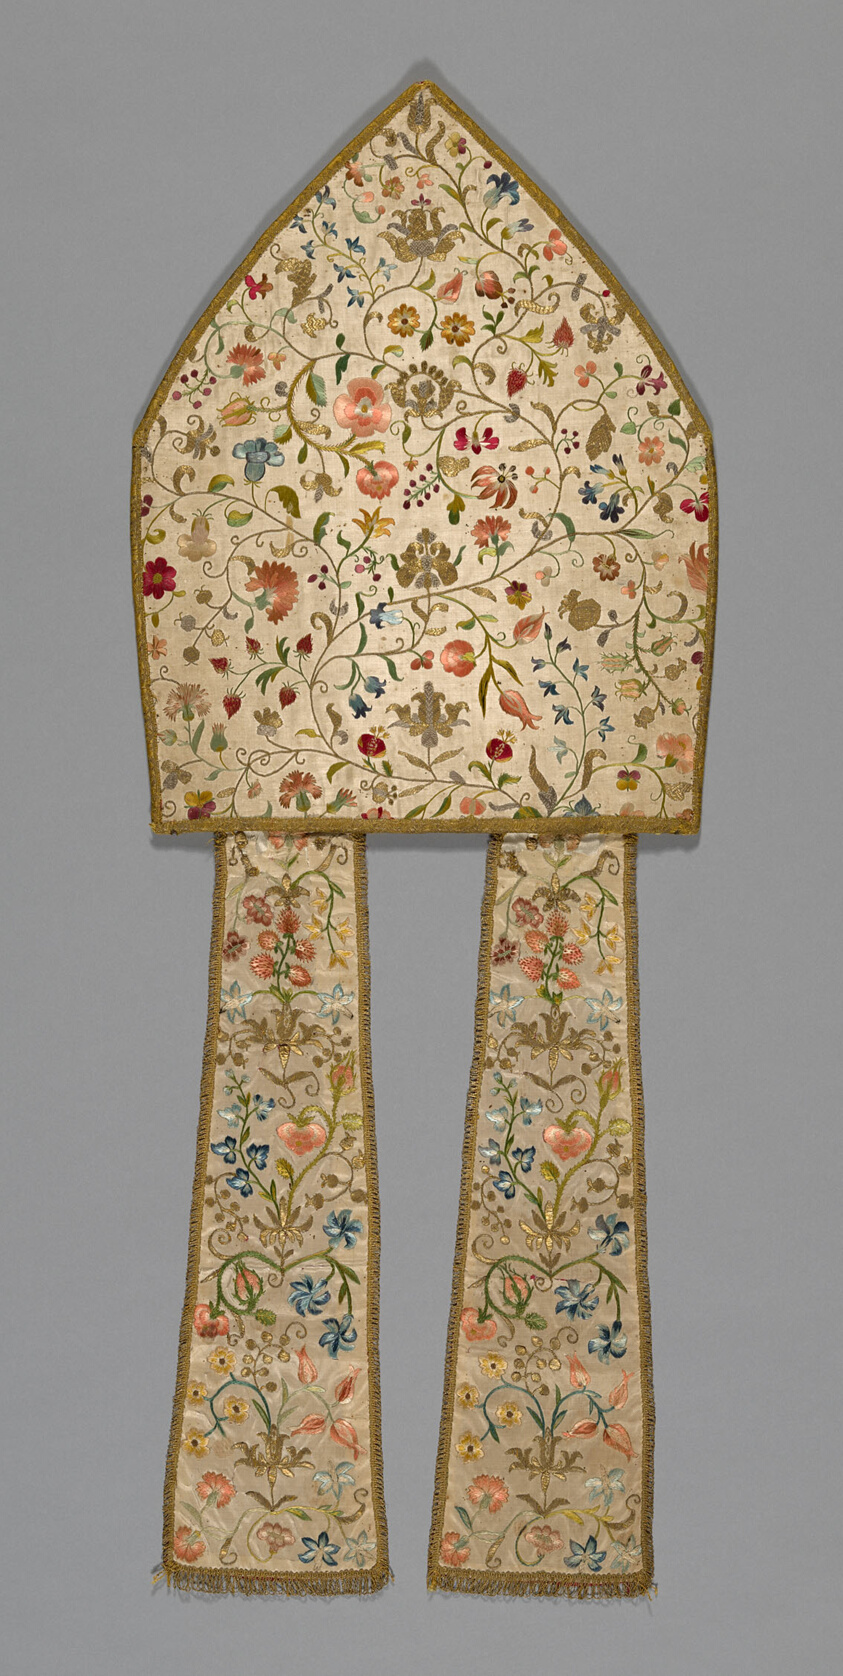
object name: Textile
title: Mitre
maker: Probably Italy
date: 1750/1800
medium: Mitre: silk, plain weave; embroidered with silk floss and gilt-metal-strip-wrapped silk in bullion, running, satin, split, and stem stitches; laid work, couching, and French knots; edged in woven braid and fringe; case: leather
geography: Italy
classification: textile; needlework (visual works); liturgical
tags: coat of arms, royalty